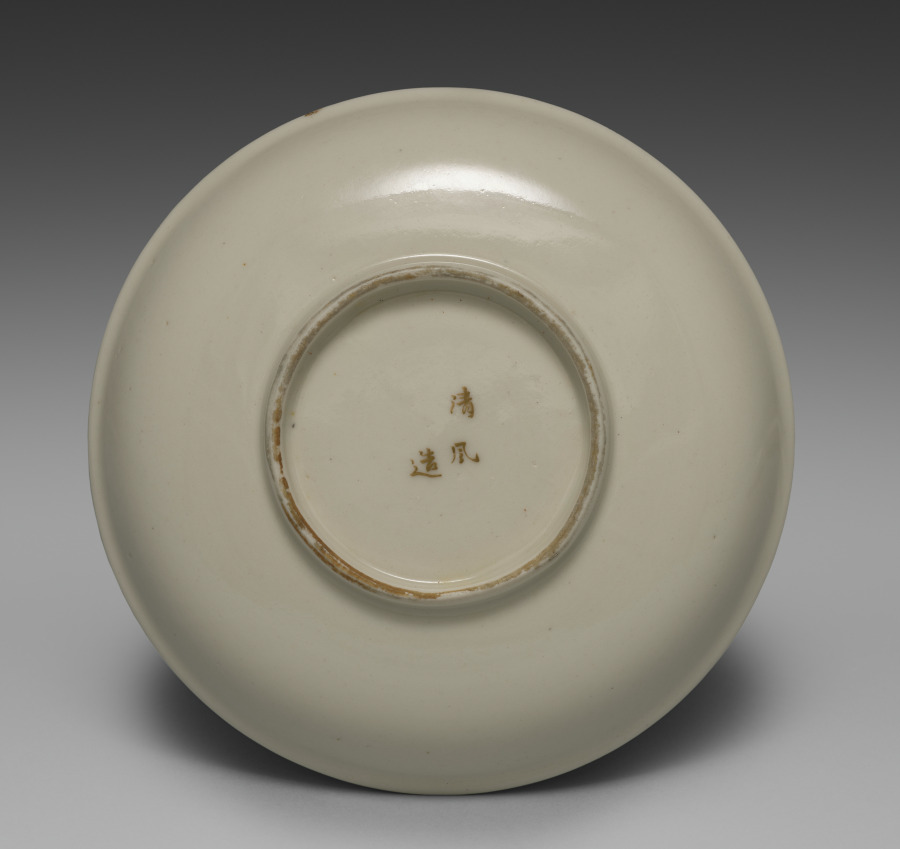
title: Medium-sized Dish from Dining Set with Plum Blossoms and Cracked-Ice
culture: Japan, Meiji period (1868–1912)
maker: Seifū Yohei II (Japanese, 1844–1878)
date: c. 1875–78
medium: Porcelain with molded designs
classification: Ceramic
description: Each item in this set has a delicate low-relief design of flowering plum branches over scattered, intersecting lines meant to resemble the cracked-ice surface of a frozen body of water and is signed on the base in gold pigment. While Yohei II produced many fine works in underglaze blue, like those produced by Kiyomizu Shichibei, he also made works in quite different styles later in his career, from the early 1870 s. In 1873, he was appointed purveyor to the Industrial Center of Kyoto Prefecture, a designation associated with Kyoto’s efforts to reach an international market through the port of Kobe; and from 1875 until his death, he was involved in national-level projects to present Japanese ceramics across the world. It was during this period that Yohei III was apprenticed to Yohei II, and it has been suggested that this set may in fact be an early example of Yohei III’s work, which he signed with his teacher’s name. Decorated with flowers resembling Japanese textile motifs, the set calls to mind the design of Yohei II’s pair of vases with plum blossoms in the Victoria and Albert Museum. Here, the elaborate trees created for a formal public exhibition setting have been translated into the approachable blossoms of the genteel domestic environment. While the designs are consistent across the pieces, each raised flower petal and pistil and each incised line in the ice was done by hand, so the cups, bowls, and dishes are similar yet unique. The bottoms of two boxes once identified the set’s owner, but the information has been deliberately obscured with black ink. However, inscriptions still visible appear to indicate two occasions, once at the end of July 1886 , and once again in June 1916 , when parts of the set were requested from Hokura in Niigata Prefecture. The location corresponds to a neighborhood in the present-day city of Jōetsu. The surname Tsuji 辻 also appears on a paper tag affixed to one of the box cloths. Future research may possibly reveal more about their provenance. A vase by Yohei III in a private collection combines the formal grandeur of the Yohei II vases in the Victoria and Albert Museum with the gentler design of this dining set, placing flowering plum trees against soft, scalloped-edge clouds resembling those in golden screens.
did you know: The dining wares have a creamy white coloration that the four boxes containing them identify as Korean in style.